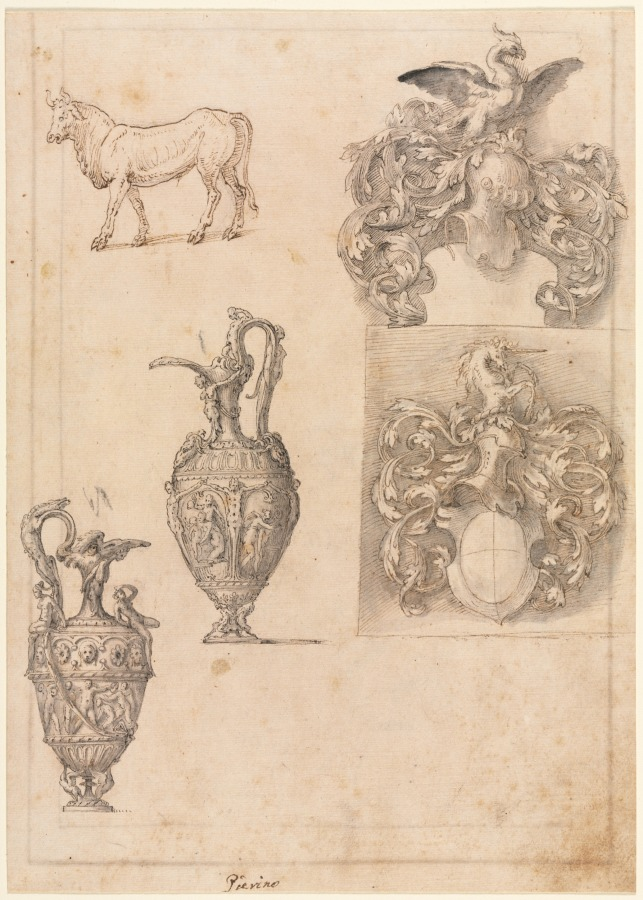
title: Design for Two Vases, Two Coats of Arms, and a Bull (recto)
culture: Italy, 16th century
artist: Luzio Romano (Italian, active 1528–75)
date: mid 1500s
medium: pen and brown ink and brush and gray and brown wash over black chalk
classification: Drawing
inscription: lower center, in brown ink: Pierino ; VERSO OF SECONDARY SUPPORT, lower right, in graphite: A3103